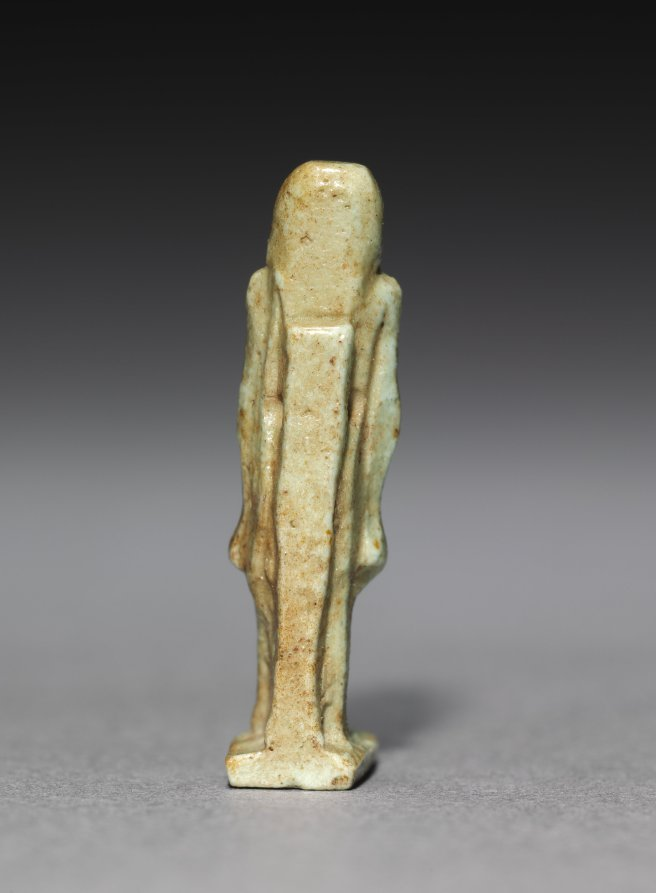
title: Amulet of Thoth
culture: Egypt, Late period (715–332 BCE), Dynasty 30–Greco-Roman period (332 BCE–395 CE), Ptolemaic dynasty (305–30 BCE)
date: 305–30 BCE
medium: gray green faience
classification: Amulets